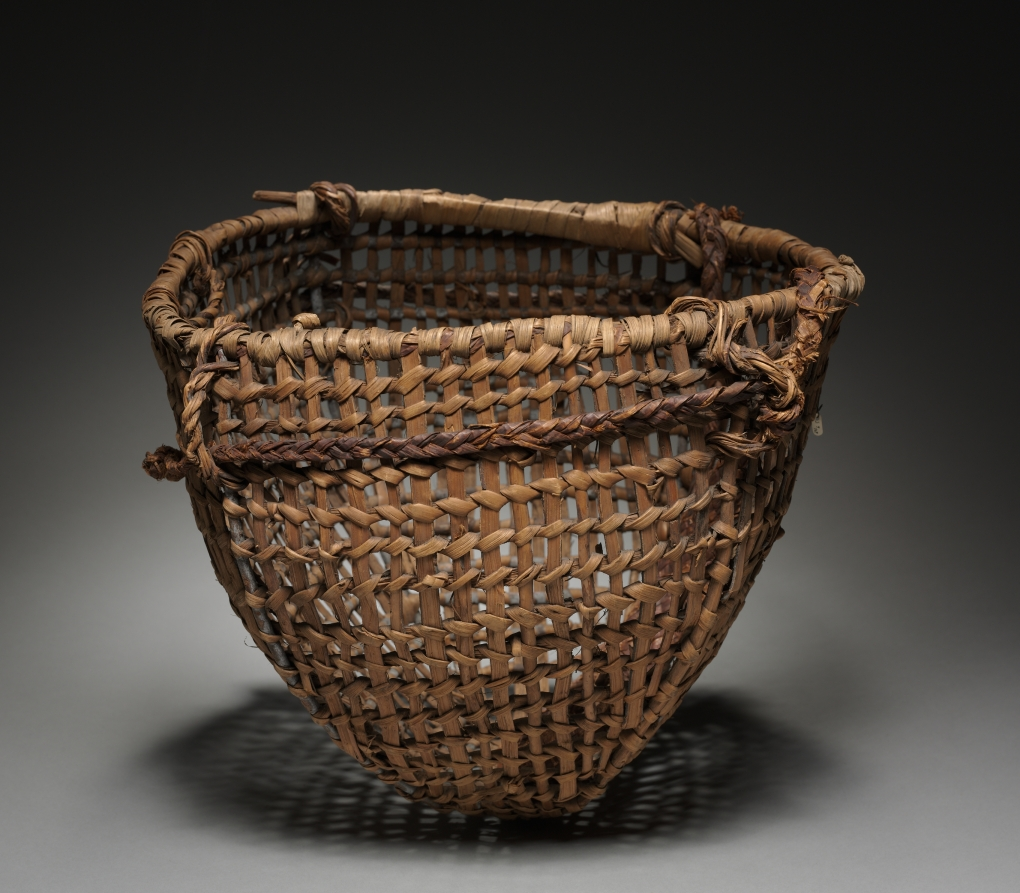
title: Clam basket with Tump Line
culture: Northwest Coast, Klallam, late 19th century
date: late 1800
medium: Cedar root; openwork, braided, plaited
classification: Basketry